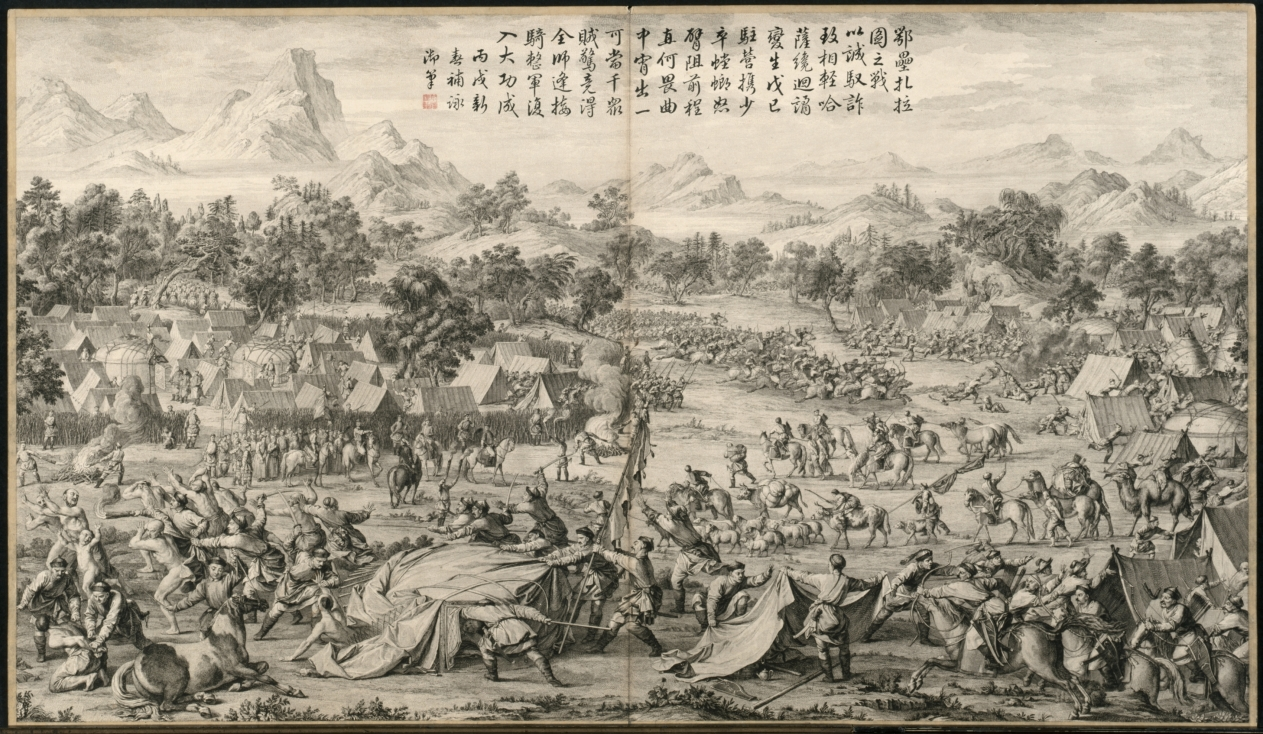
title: The Battle at Elei Zhalatu: from Battle Scenes of the Quelling of Rebellions in the Western Regions, with Imperial Poems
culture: China, Qing dynasty (1644–1911), Qianlong reign (1736–95)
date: c. 1765–74; poem dated 1766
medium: etching, mounted in album form, 16 leaves plus two additional leaves of inscriptions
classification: Print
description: This set of etchings was commissioned by Emperor Qianlong to record in pictorial terms the courage of his generals and soldiers in quelling the rebellions in China's western regions. Qianlong added his own poem to each of the etchings, indicating his appreciation and pride in this demonstration of military might. "Western Regions" refers to the present-day Xingjiang province, often described in Western writing as "Central Asia."